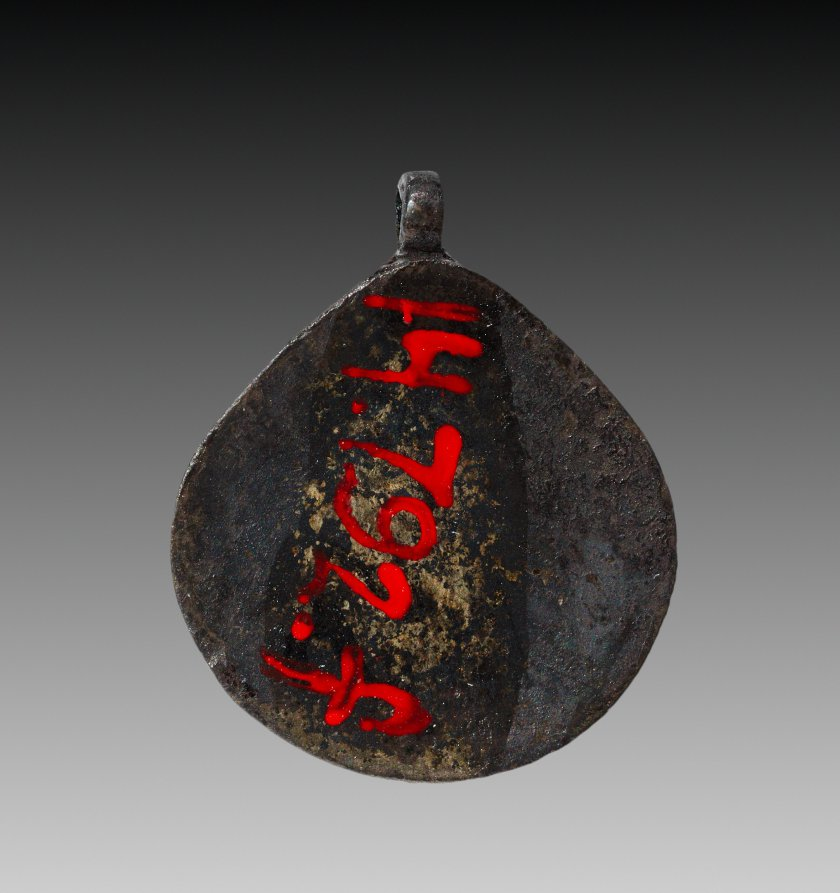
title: Oyster-Shell Pendant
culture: Egypt, Middle Kingdom (2040–1648 BCE), Dynasty 12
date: 1980–1801 BCE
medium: carnelian and silver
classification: Jewelry